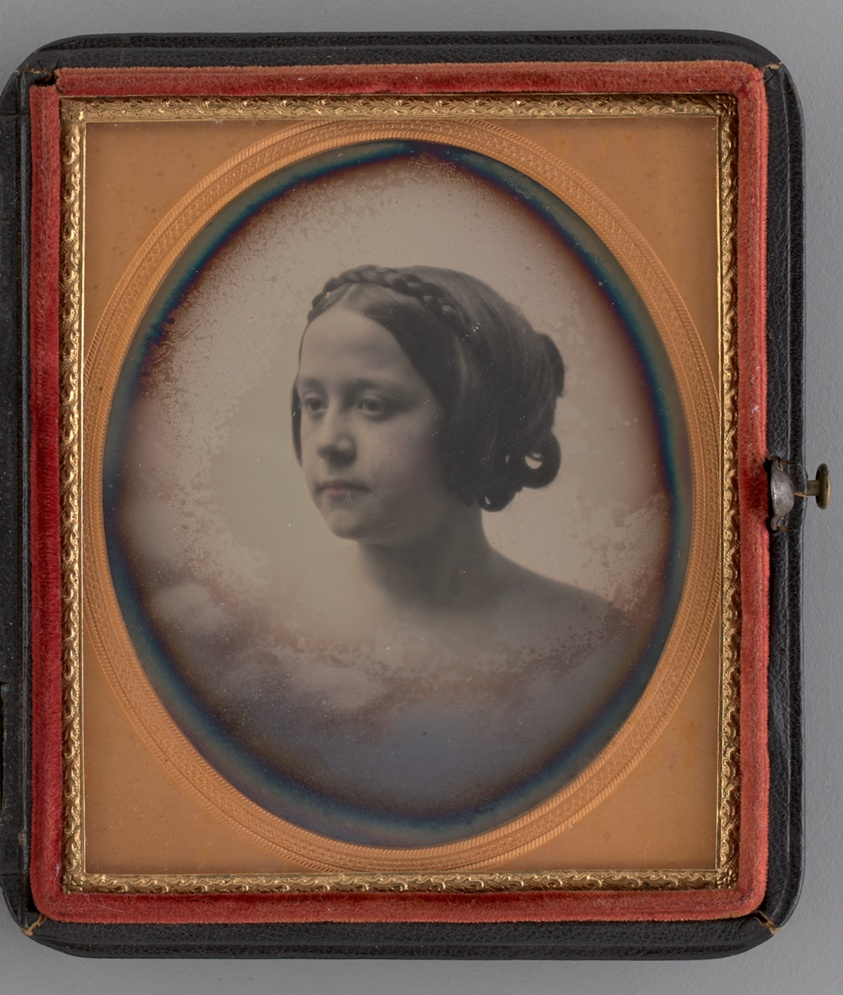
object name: Photograph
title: Untitled (Portrait of Girl)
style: 19th century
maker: Albert Sands Southworth (American, 1811-1894); and Josiah Johnson Hawes (American, 1808-1901)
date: 1860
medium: Daguerreotype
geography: United States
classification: portrait; photograph; photographic process; photography; portrait; daguerreotype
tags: lundberg collection, portraits, portraits: female subject, children, female, portrait, portraits: child subject